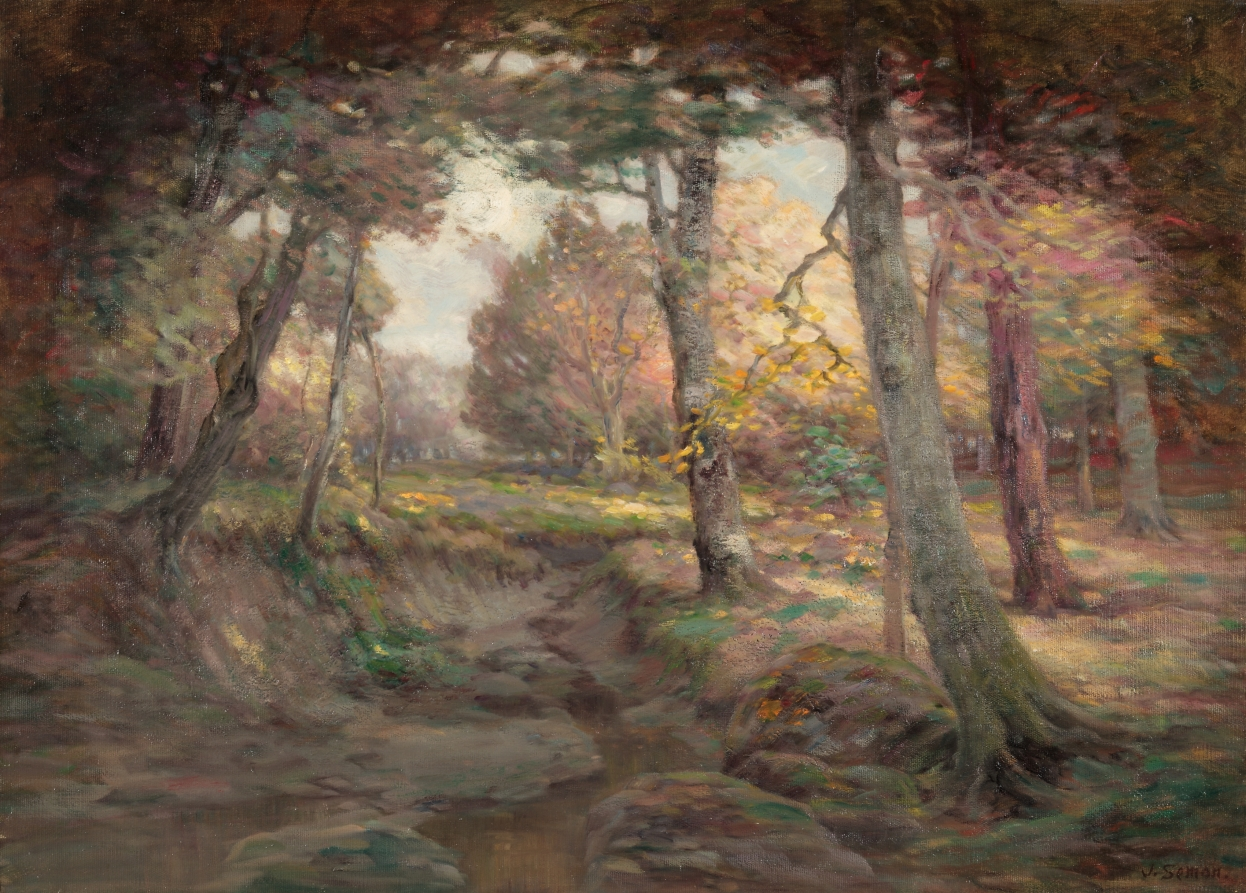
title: Edge of the Woods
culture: America, Ohio, Cleveland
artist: John Semon (American, 1852–1917)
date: c. 1890s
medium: oil on canvas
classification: Painting